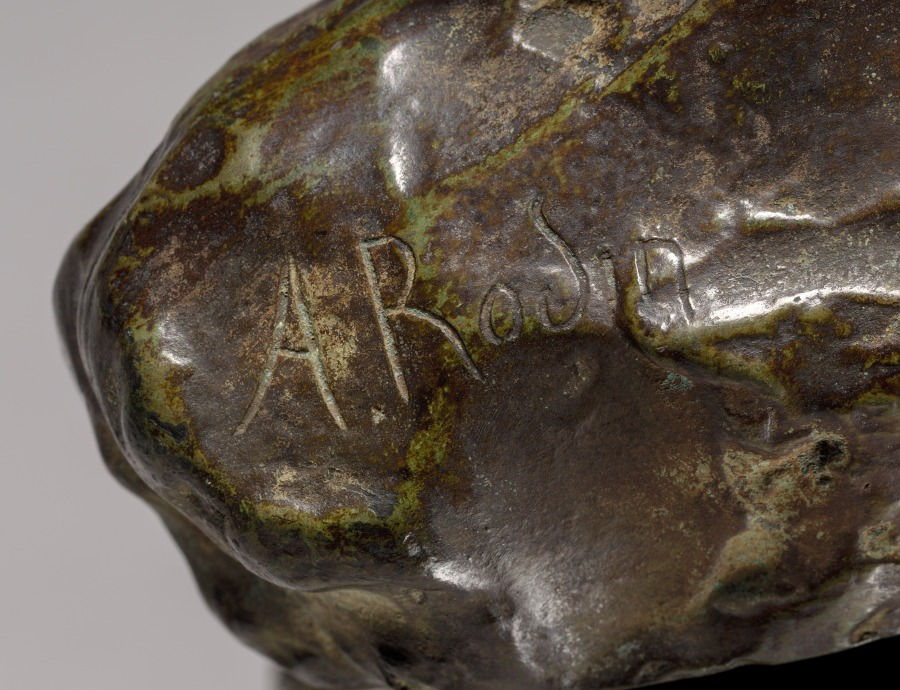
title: Bust of Victor Hugo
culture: France, 19th century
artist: Auguste Rodin (French, 1840–1917)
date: 1883 modeled; cast by 1917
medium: bronze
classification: Sculpture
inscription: inscribed on back: "A. Rodin" signed "Rodin" (back, lower left)